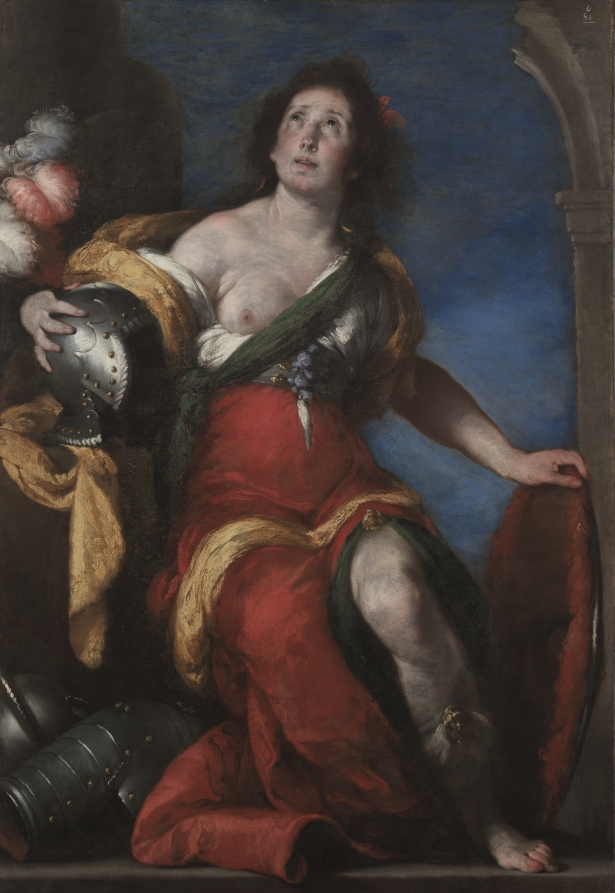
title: Allegorical Figure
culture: Italy, 17th century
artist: Bernardo Strozzi (Italian, 1581?-1644)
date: c. 1636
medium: oil on canvas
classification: Painting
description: During the 1630s, the Genoese artist Bernardo Strozzi painted a number of female figures representing various intellectual and artistic pursuits, reflecting the appeal of such allegories among learned patrons in northern Italy. Recent scholarship has convincingly identified the subject of this painting as Minerva. The Roman goddess of war has put aside her armor for more contemplative pursuits; her upward gaze—as if seeking inspiration—recalls her other associations with wisdom, eloquence, and the arts.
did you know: The preparatory drawing for this painting is also in the collection of the Cleveland Museum of Art (1953.626).